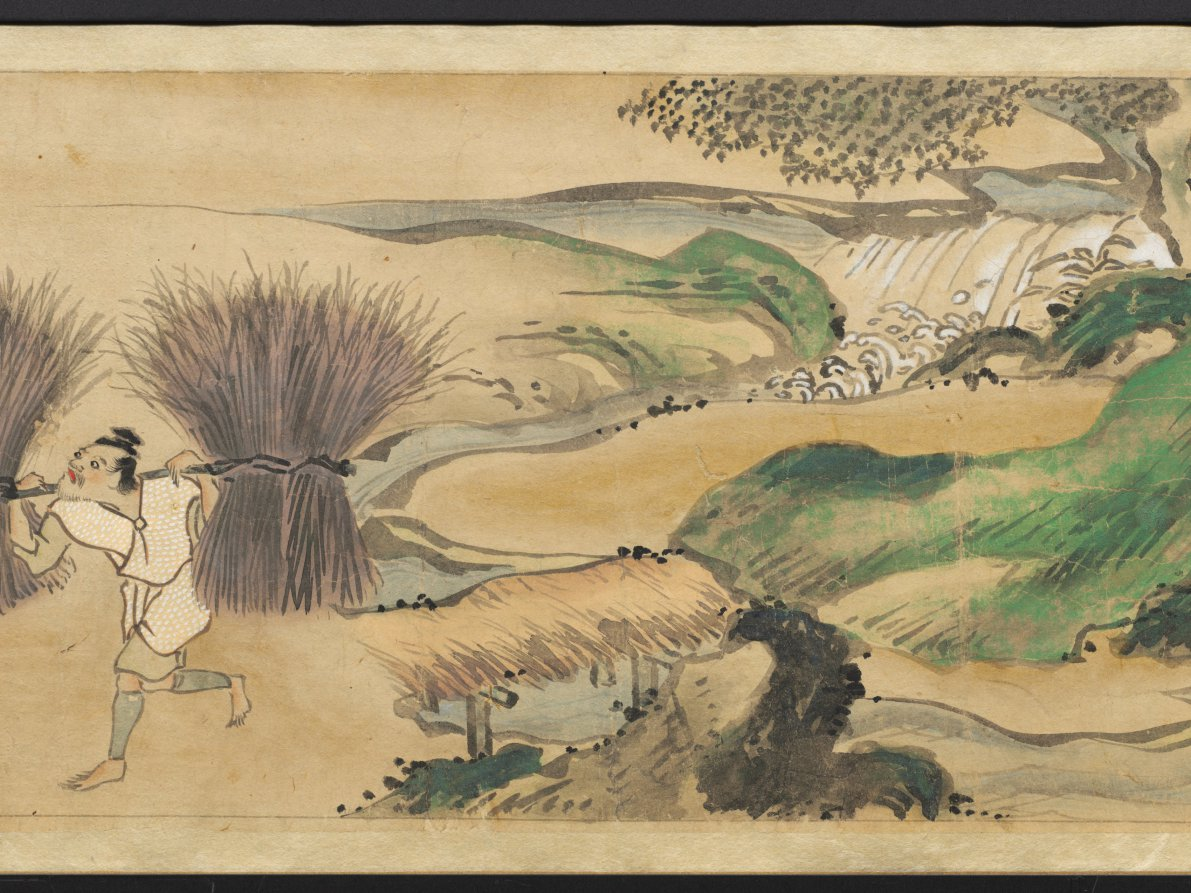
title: The Saltmaker's Story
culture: Japan, Edo period (1615–1868)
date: early 1600s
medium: One of a pair of handscrolls; ink, color, and gold on paper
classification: Painting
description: Once read and copied by girls at New Year’s celebrations and included in dowries, The Saltmaker’s Story is a rags-to-riches tale in which daughters are gifts from the gods. Despite his simple outlook, the main character progresses from humble roots as an associate at Kashima Shrine to the elite status of grandfather of the emperor through the intervention of the Kashima deity. The Saltmaker’s Story is traditionally presented in a set of three scrolls, but the text of this set has been removed by a previous owner, who remounted the illustrations as a pair. The paintings of this one take us from right to left through the first half of the tale.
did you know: This handscroll originally had texts before its paintings, but the texts were removed.